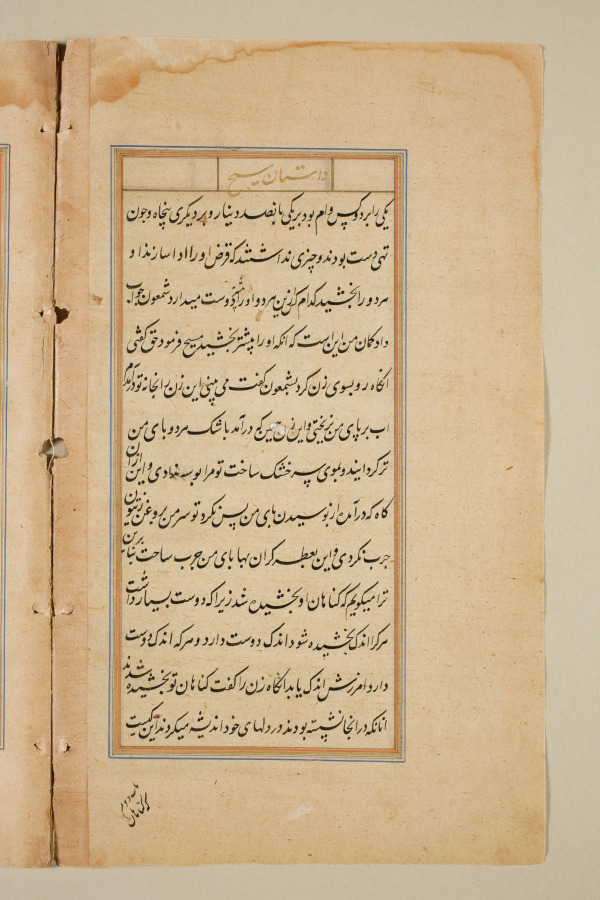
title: Text page from a Mirror of Holiness (Mir’at al-quds) of Father Jerome Xavier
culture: Mughal India, Allahabad, made for Prince Salim (1569–1627)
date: 1602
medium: Ink and gold on paper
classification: Manuscript